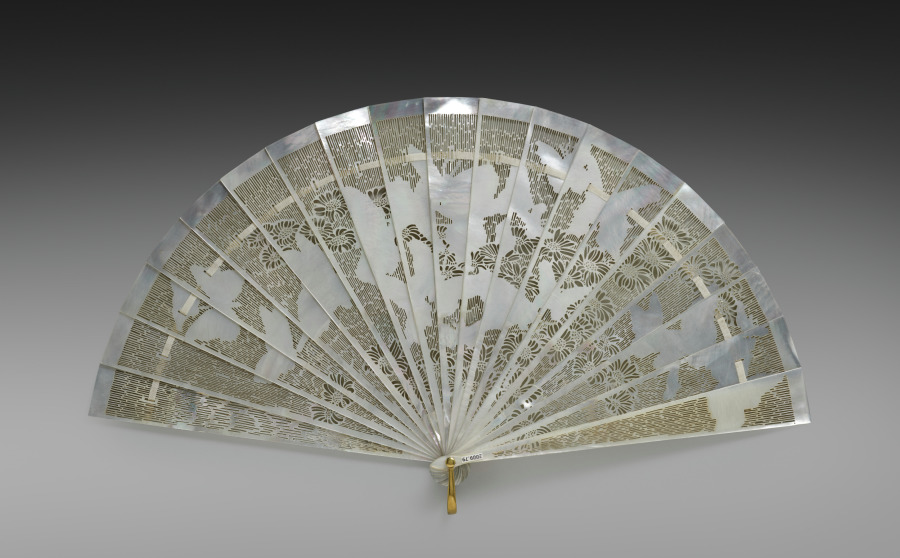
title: Fan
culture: France, 20th century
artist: René Lalique (French, 1860–1945)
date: c. 1900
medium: mother-of-pearl, gold, silk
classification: Jewelry